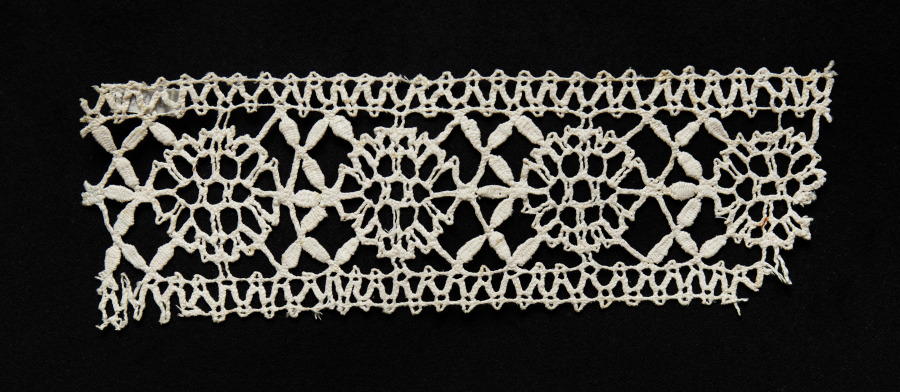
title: Lace Insertion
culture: Italy, Genoa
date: 1500s–1600s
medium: Bobbin lace (needle lace, reticella design)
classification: Lace